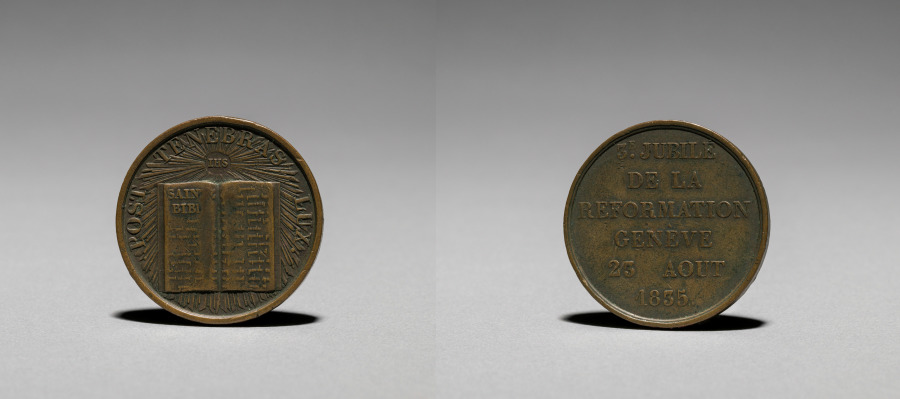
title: Medal: Commemorating 3c Jubilé de la Reformation Genève 23 Aôut 1835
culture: France ? or Switzerland ?, 19th century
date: 1835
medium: bronze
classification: Metalwork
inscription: Post tenebras lux lux I.H.S. Saint Bibi (last letter effaced).